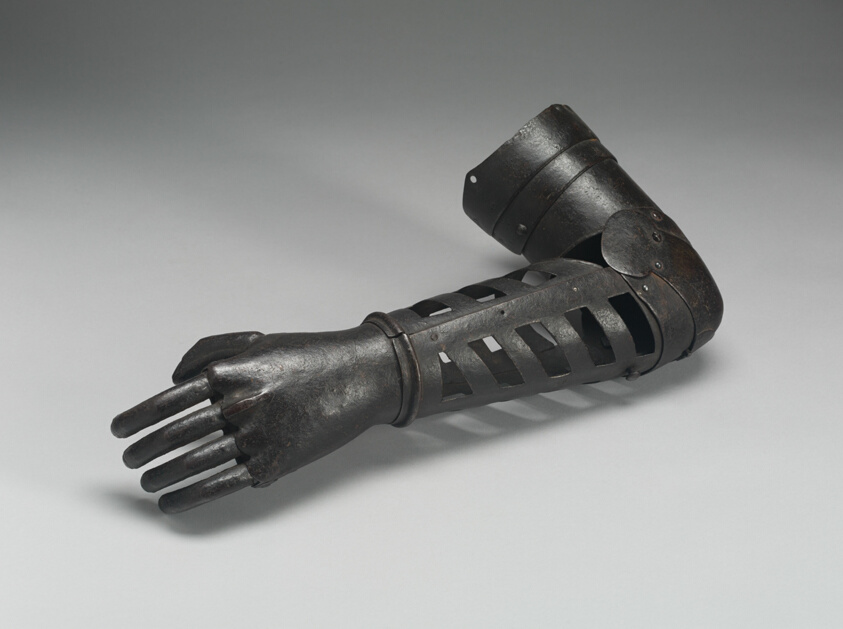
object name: Armor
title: Prosthetic Left Hand and Arm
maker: German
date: c. 1600/30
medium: Iron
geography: Germany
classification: arms and armor, miscellaneous; arms and armor; armor